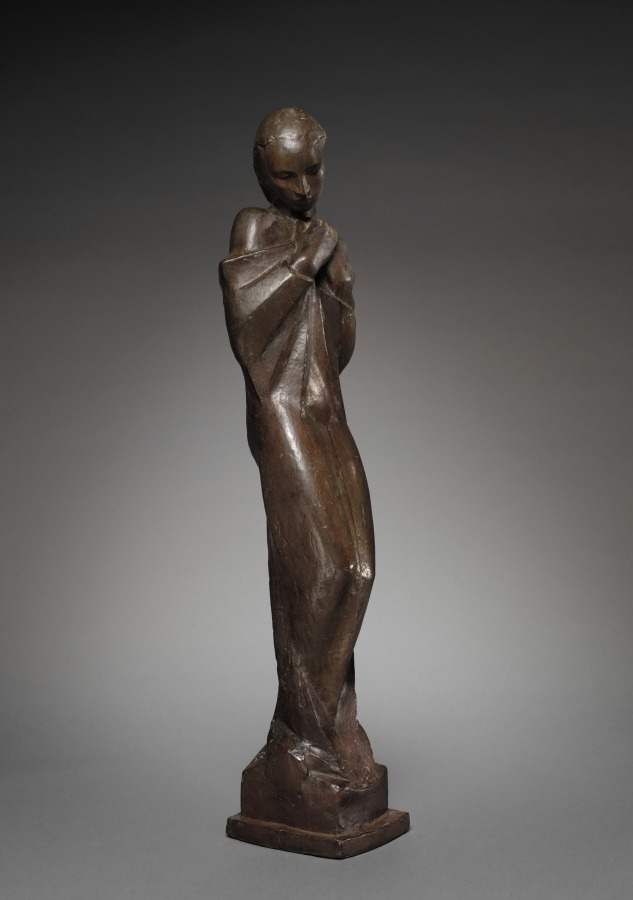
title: Adagio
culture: Germany, 20th century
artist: George Kolbe (German, 1877–1947)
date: 1923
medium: gilt bronze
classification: Sculpture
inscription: Signed lower left corner: "GK II"